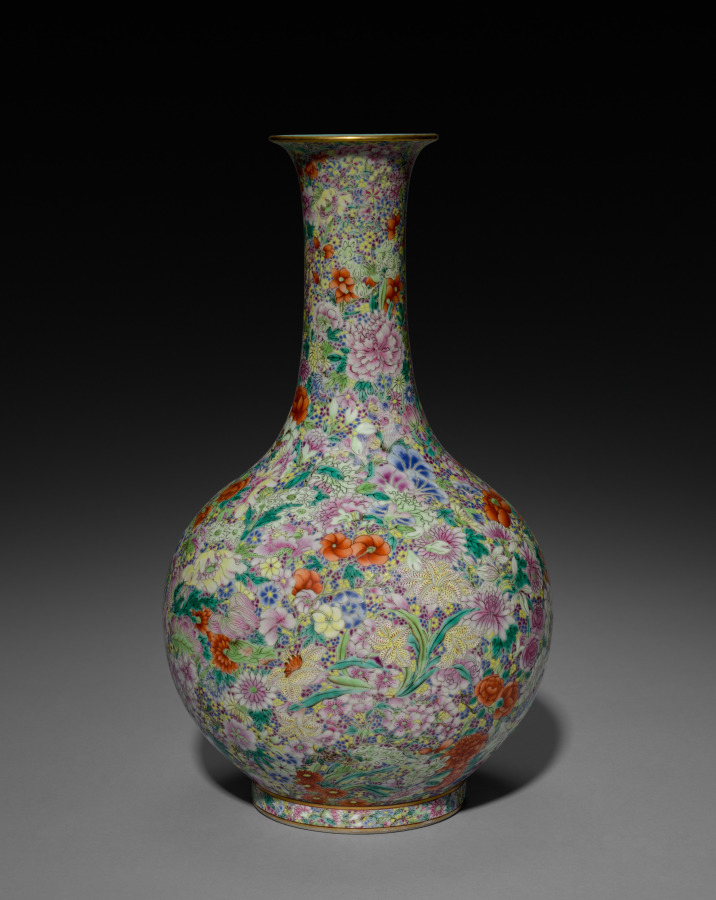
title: Bottle-Shaped Vase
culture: China, Qing dynasty (1644–1911), Jiaqing reign (1796–1820)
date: 1796–1820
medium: Porcelain, overglaze colors and gold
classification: Ceramic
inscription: 大清嘉慶年制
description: This vase is densely decorated with peonies, morning glories, lilies, and lotuses. Purple, yellow, and blue petals fill the surface, forming a continuous millefleur (thousand-flower) pattern. Each petal is delicately shaded to suggest volume and depth, creating a vivid yet orderly composition. The mouth is painted with gold pigment to imitate metal, evoking the appearance of copper-body-painted enamel as seen in Qing dynasty court art. Qing palace records indicate that vases with such patterns were used in everyday flower-viewing displays. In late Qing inventories, comparable examples were listed as furnishings for the emperor and his consorts.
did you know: Porcelain with this dense floral millefleurs decoration and a multitude of overglaze enamel colors was first made in the Qing dynasty and remained popular into the late 1800s.